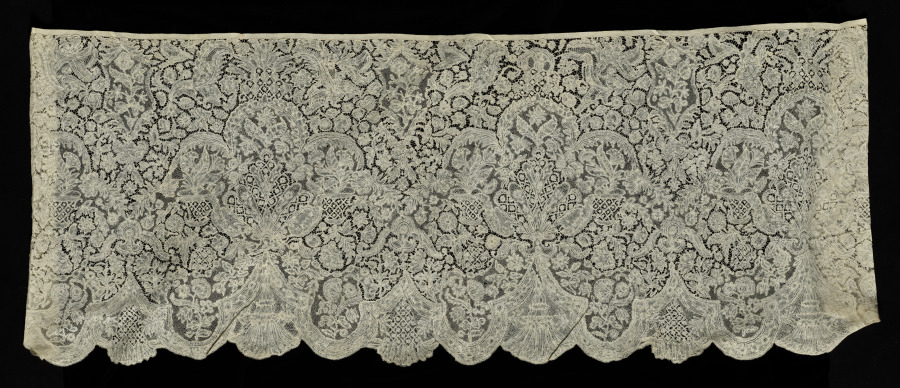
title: Lace Flounce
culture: Belgium, Brussels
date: 1700s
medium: Linen: bobbin lace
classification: Lace